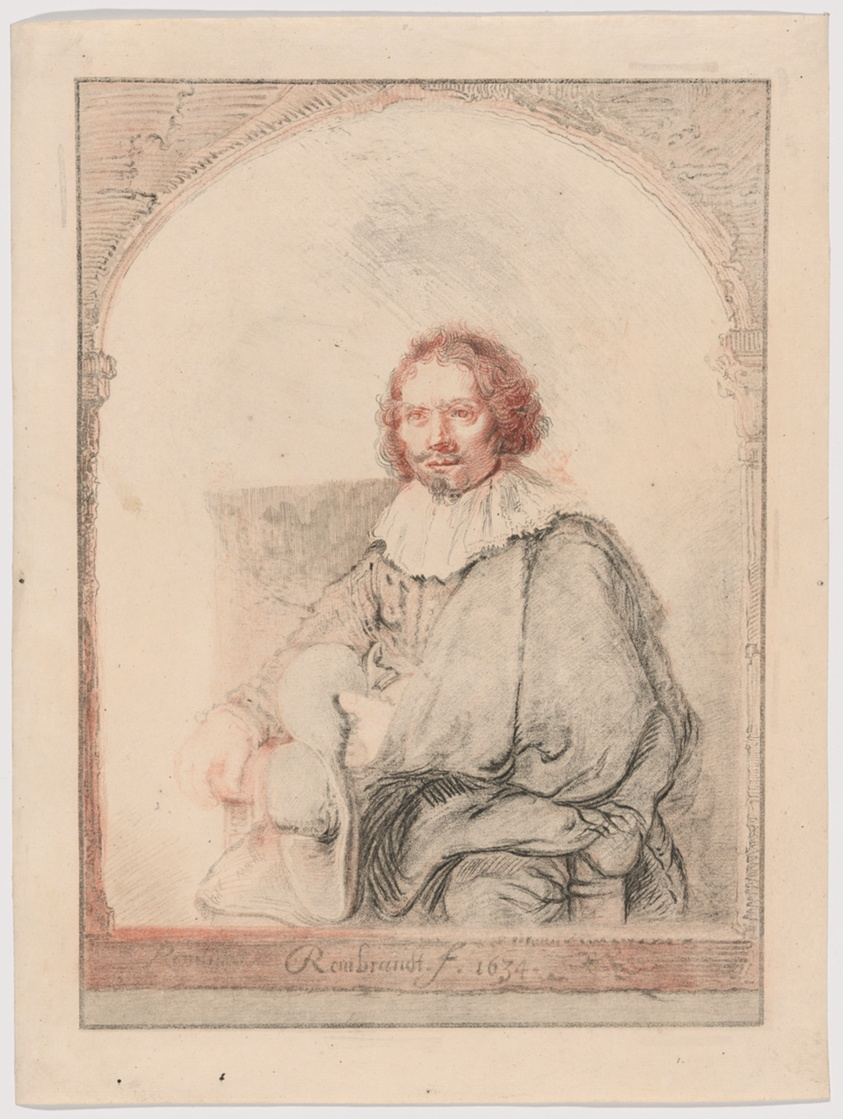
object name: Print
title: Portrait of a Man in an Armchair, from Collection d'imitations de Dessins d'après les Principaux Maîtres Hollandais et Flamands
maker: Christian Josi (Dutch, died 1828); after Rembrandt van Rijn (Dutch, 1606-1669)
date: 1826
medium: Soft ground etching from two plates, with roulette, on paper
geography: Holland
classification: etching; print; prints and drawing